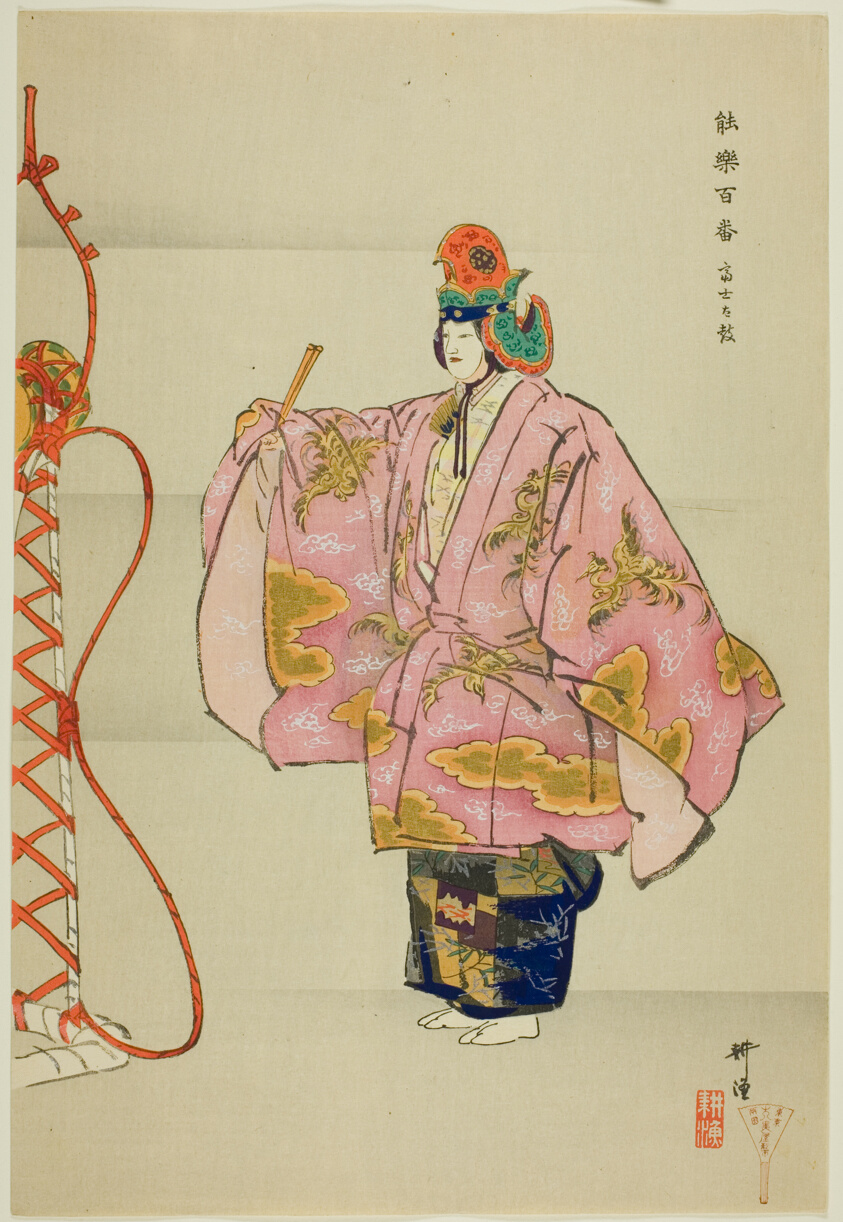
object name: Print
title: Fuji Taiko, from the series "One Hundred No Dramas (Nogaku hyakuban)"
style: Japanese (culture or style)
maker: Tsukioka Kogyo; Japanese, 1869-1927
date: 1898/1903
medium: Color woodblock print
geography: Japan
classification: woodblock print; print; asian art